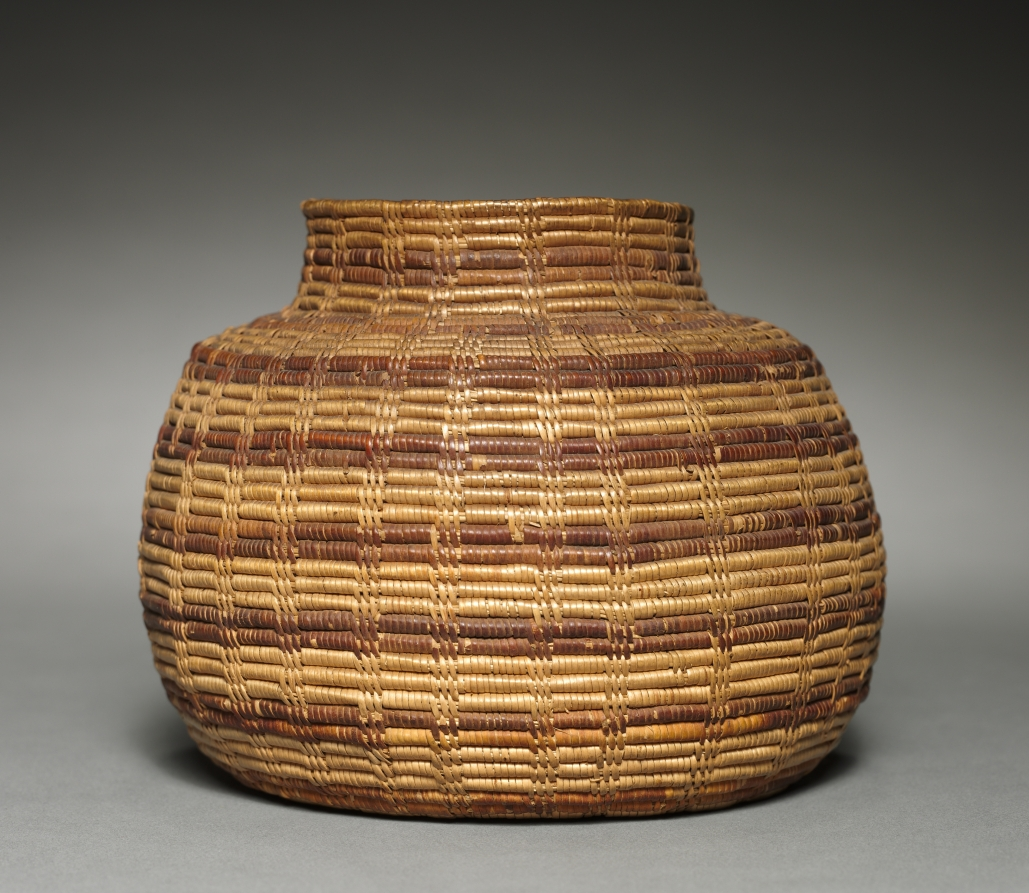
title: Jar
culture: California, Tübatulabal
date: 1895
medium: Sumac, yucca root; coiled, skip-stitch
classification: Basketry